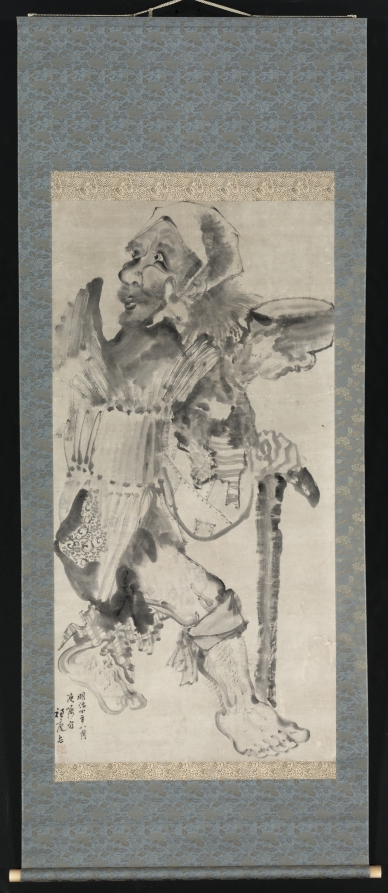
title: Beggar (Kojiki)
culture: Japan, Meiji period (1868–1912)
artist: Hirafuku Suian (Japanese, 1844–1890)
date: 1871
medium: hanging scroll; ink on paper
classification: Painting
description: The Japanese term for beggar, kojiki, derives from the word kotsujiki, which refers to Buddhist monks taking bowls from door to door to request sustenance. The son of the artist Suian Bunrō, Suian Hirafuku was born in Kakunodate in Japan’s northern Akita prefecture. When he was 16, he went to study in Kyoto. In 1880 he took first place with another painting titled Beggar at the third Akita Prefectural Industrial Exposition, and in 1890, he took second prize for technical achievement with Nursing Tigress at the third National Industrial Exposition.